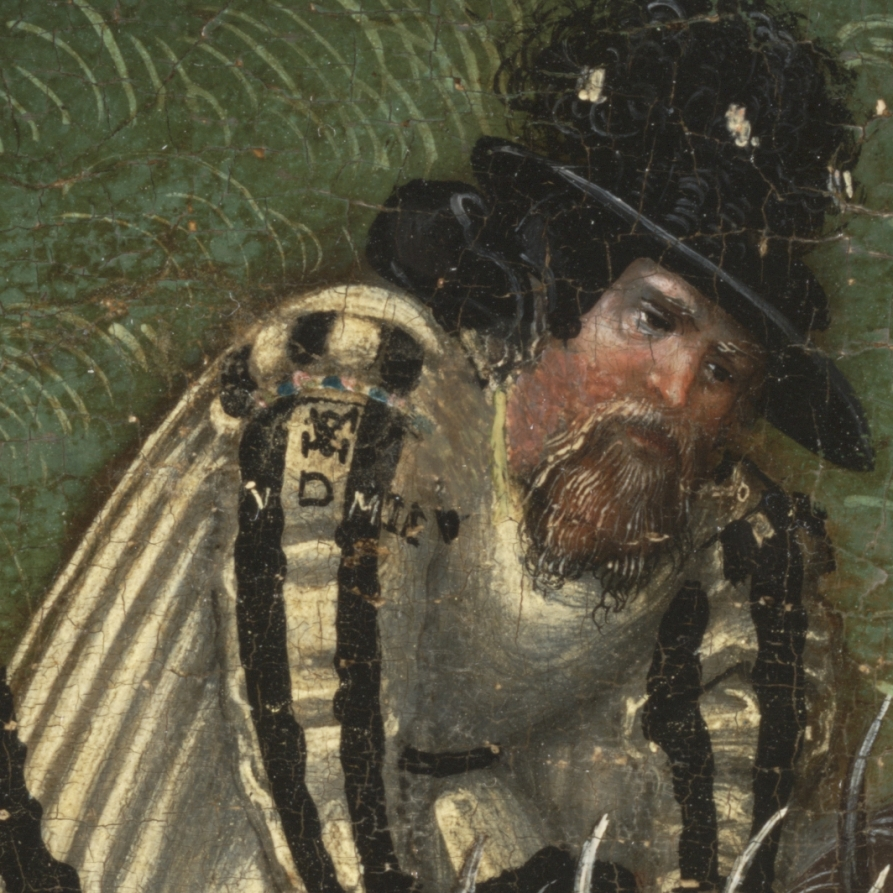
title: Hunting near Hartenfels Castle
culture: Germany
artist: Lucas Cranach (German, 1472–1553)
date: 1540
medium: oil, originally on wood, transferred to masonite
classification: Painting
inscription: Signed lower right on boat with a winged serpent, and dated: 1540 [inventory number, lower right: 1577]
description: The Protestant rulers of Saxony commissioned this animated hunt scene, set near their residence seen in the background, Hartenfels Castle (in eastern Germany). John Frederick the Magnanimous, in the bottom left corner, wears dark green hunting attire; he spans his crossbow and waits for his courtiers and dogs to chase a stag across the river. His wife, the Electress Sibylle, stands at right, poised to take the first ceremonial shot. The prince electors of Saxony were passionate practitioners of hunting with dogs—elaborate, highly rehearsed occasions, coordinated by the use of signals from hunting horns. Cranach dated this work and his signature is the winged snake at lower right. 1577 in the right corner is an inventory number.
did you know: Humans, dogs, and deer make up most of the creatures in this busy scene—but not all of them! Look closely at the background to spot a bear and three boars.